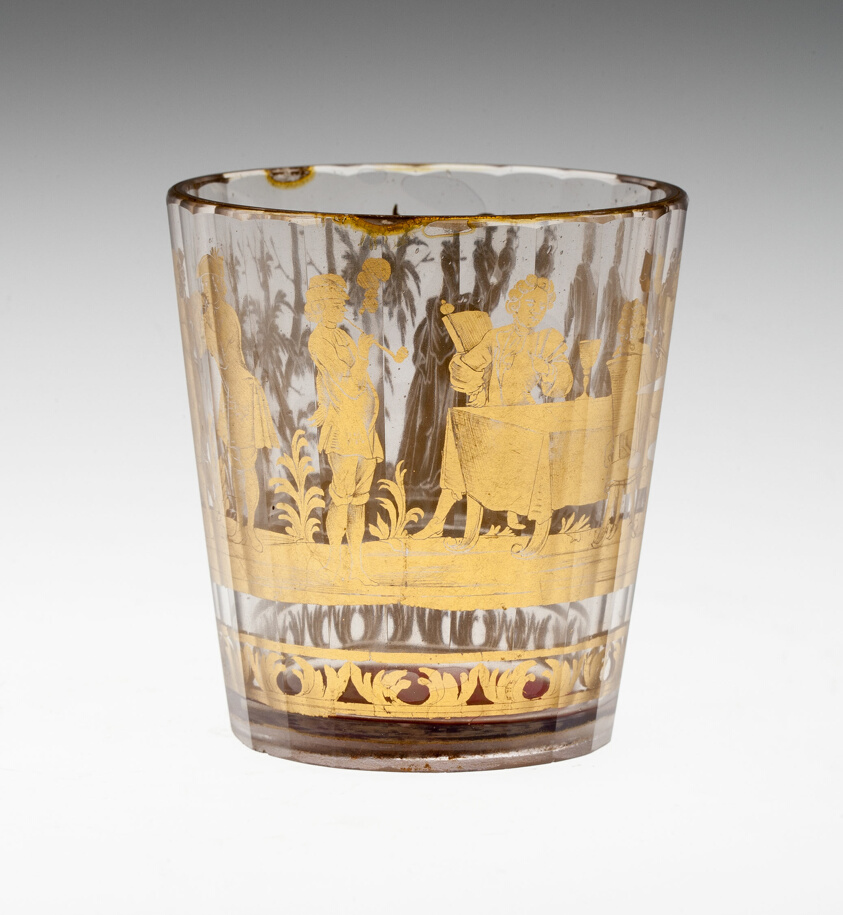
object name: Glass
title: Beaker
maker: Bohemia, Czech Republic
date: c. 1730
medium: Glass with engraved gold leaf decoration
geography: Bohemia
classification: drinking vessel; glass; european decorative arts